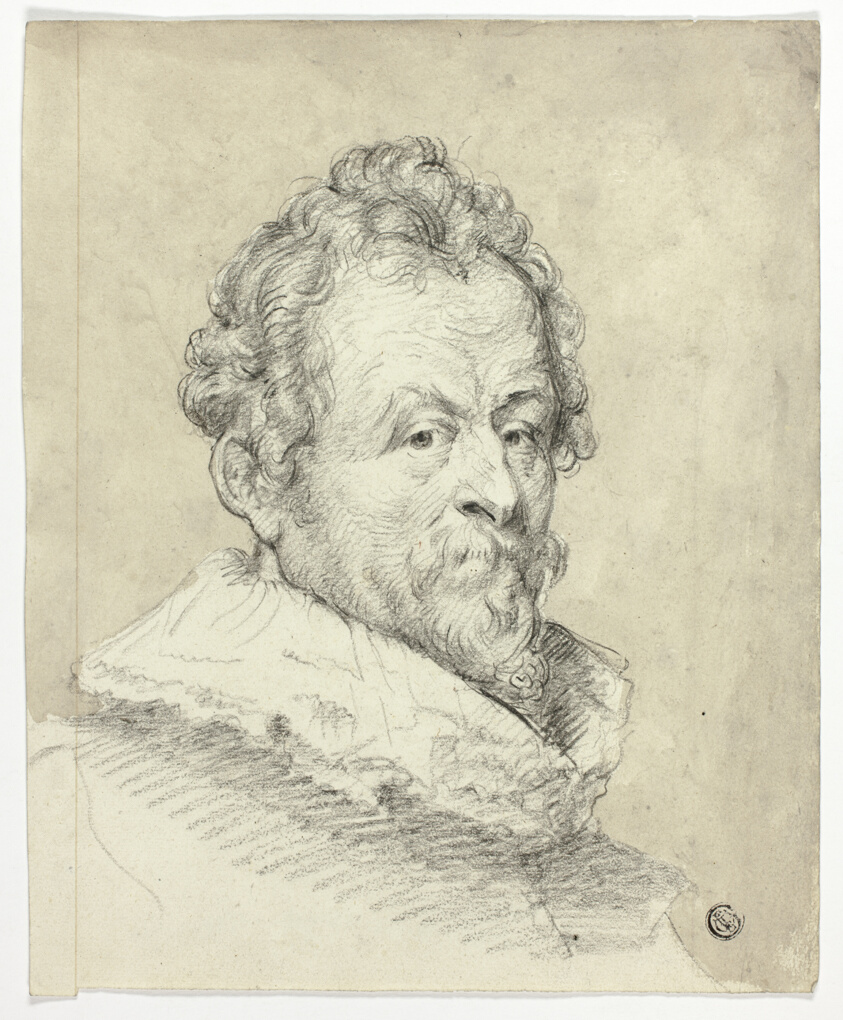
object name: Drawing and Watercolor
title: Hendrick van Balen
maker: After Anthony van Dyck; Flemish, 1599-1641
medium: Charcoal, with brush and pale brown wash, on ivory laid paper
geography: Flanders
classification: chalk; drawings (visual works); prints and drawing